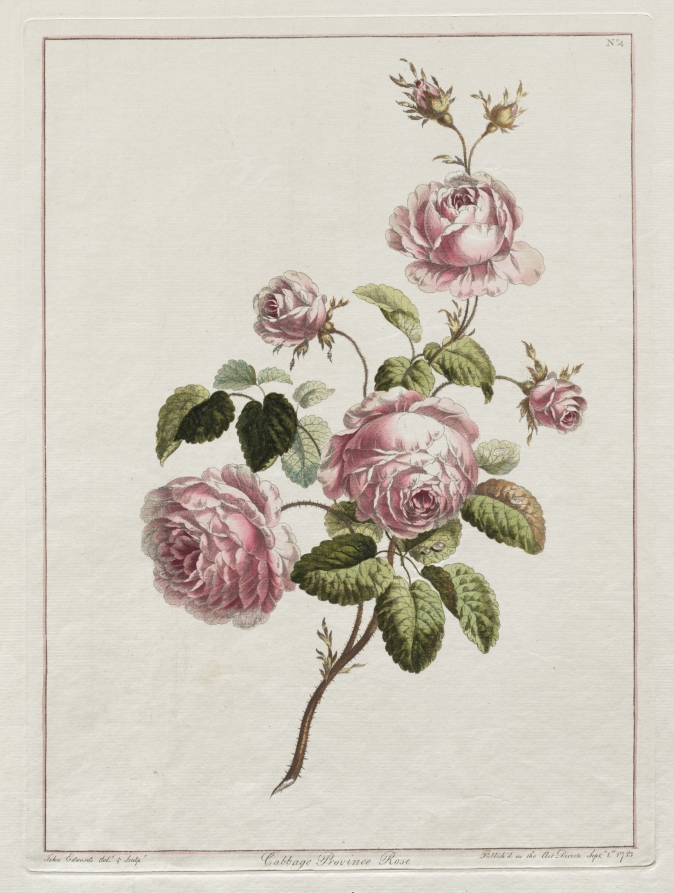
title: A Collection of Flowers Drawn after Nature - Cabbage Province Rose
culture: England, late 18th-early 19th Century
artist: John Edwards (British)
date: 1801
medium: etching, hand colored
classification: Print